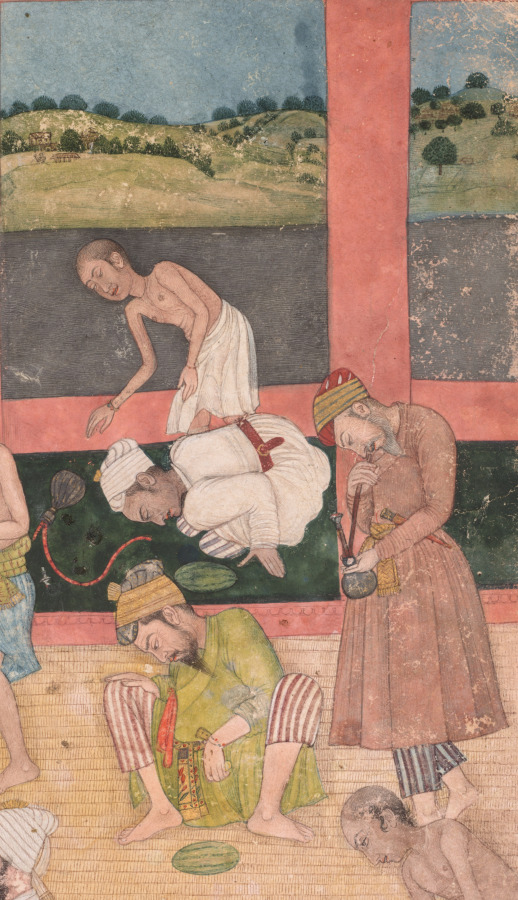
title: Opium Smokers Served Fruit and Bread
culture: India, Mughal Dynasty (1526-1756)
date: c. 1750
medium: Gum tempera and gold on paper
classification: Painting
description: A red sandstone terrace and veranda covered with a straw mat is the setting for an assemblage of more than 30 religious figures and nobles, most of whom are depicted in varying stages of intoxication and hangovers. To the left of center is a female ascetic wearing a peach-colored robe, and throughout the composition Sufi mystics wearing blue are interspersed with white-robed clerics and Mughal nobles. Some lucidly engage in discussions, while others prepare, ingest, and experience the effects of cannabis or opium known to have been taken regularly by those seeking mind-altering states. Watermelons, apples, and flatbread are being distributed among the assembled guests.